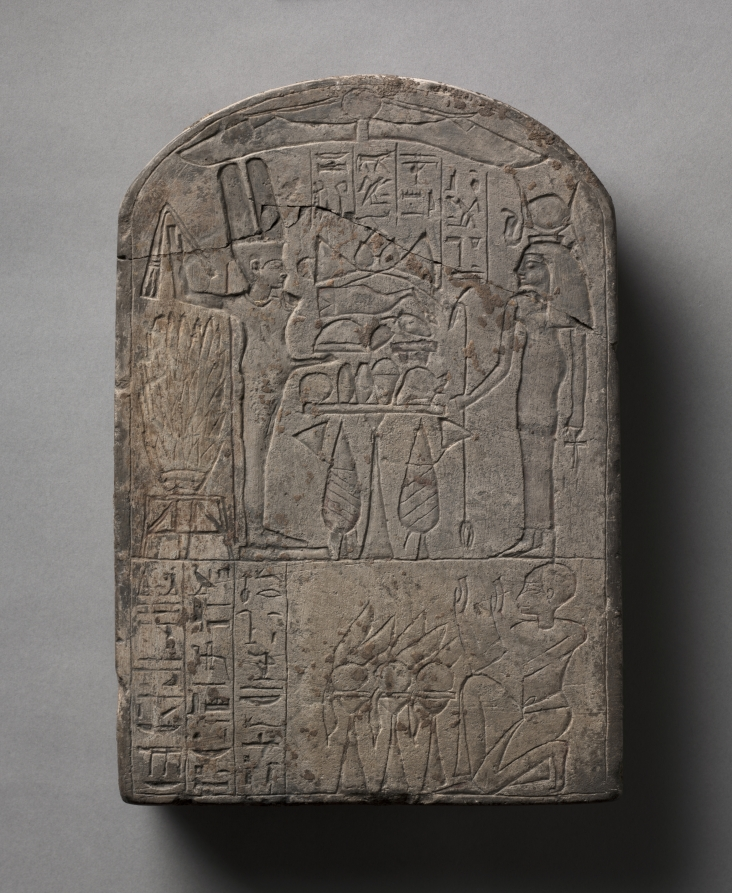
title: Stele of Neferrenpet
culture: Egypt, Probably Thebes, New Kingdom, late Dynasty 18, 1540-1296 BC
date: 1400–1296 BCE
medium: limestone, originally painted and gilded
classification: Sculpture